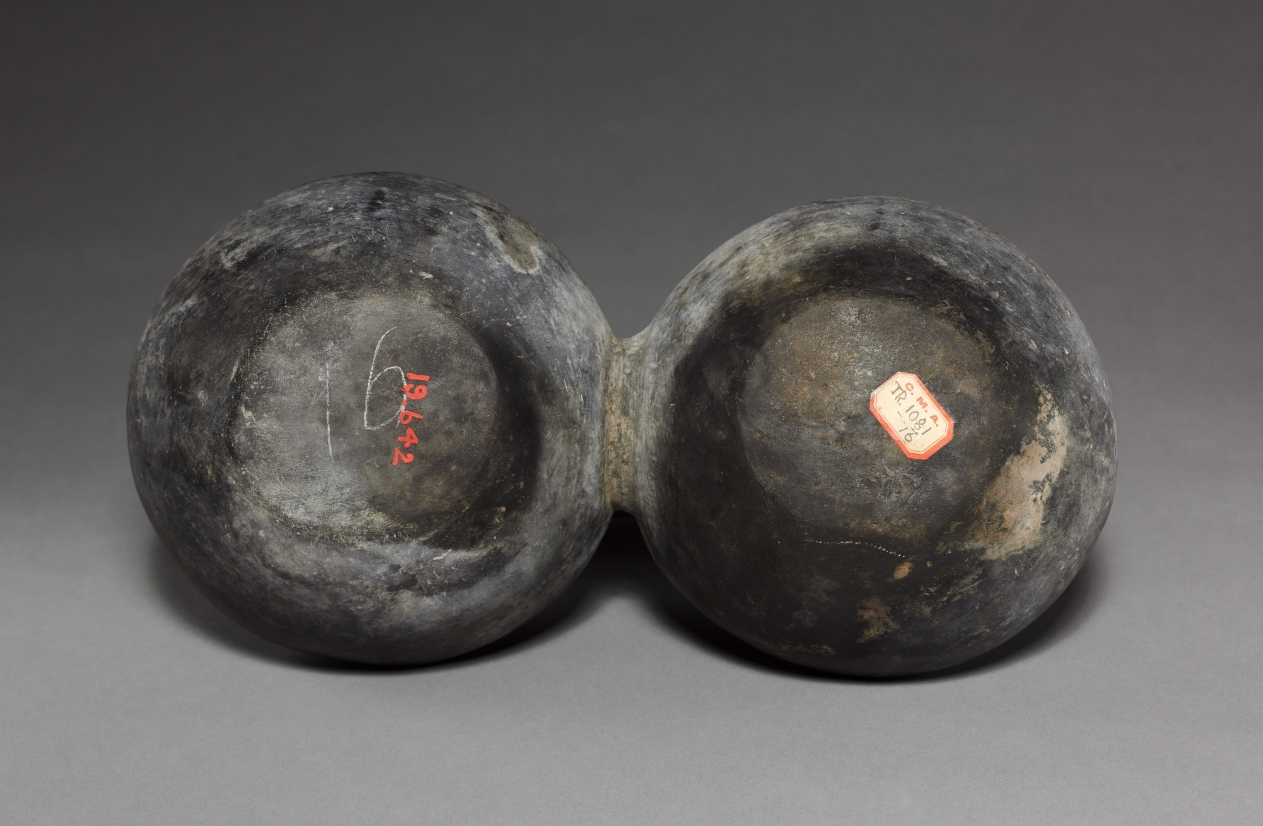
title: Bottle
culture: Peru, Chimú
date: 1300–1400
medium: pottery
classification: Ceramic